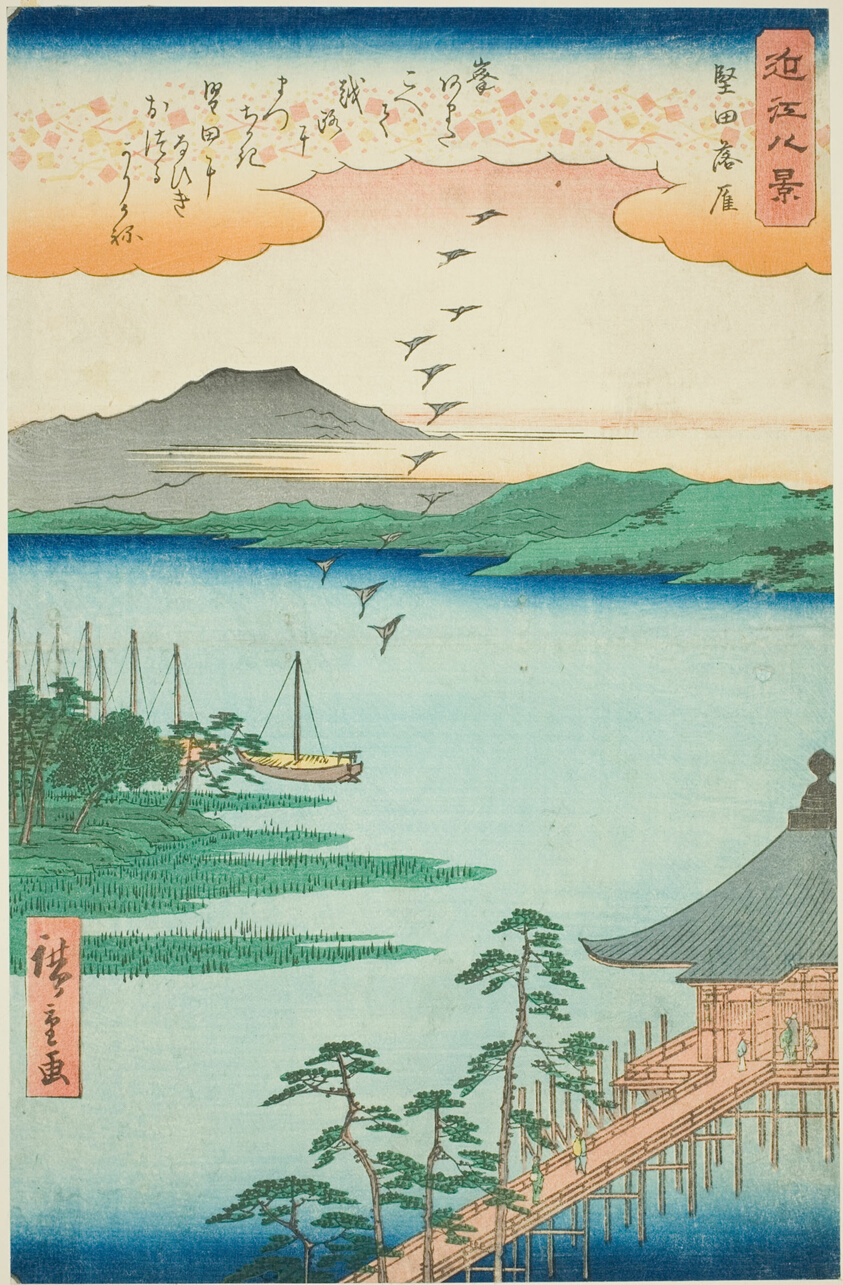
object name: Print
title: Descending Geese at Katada (Katada rakugan), from the series "Eight Views of Omi (Omi hakkei)"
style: Japanese (culture or style)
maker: Utagawa Hiroshige 歌川 広重; Japanese, 1797-1858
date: 1857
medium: Color woodblock print; oban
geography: Japan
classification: woodblock print; print; asian art